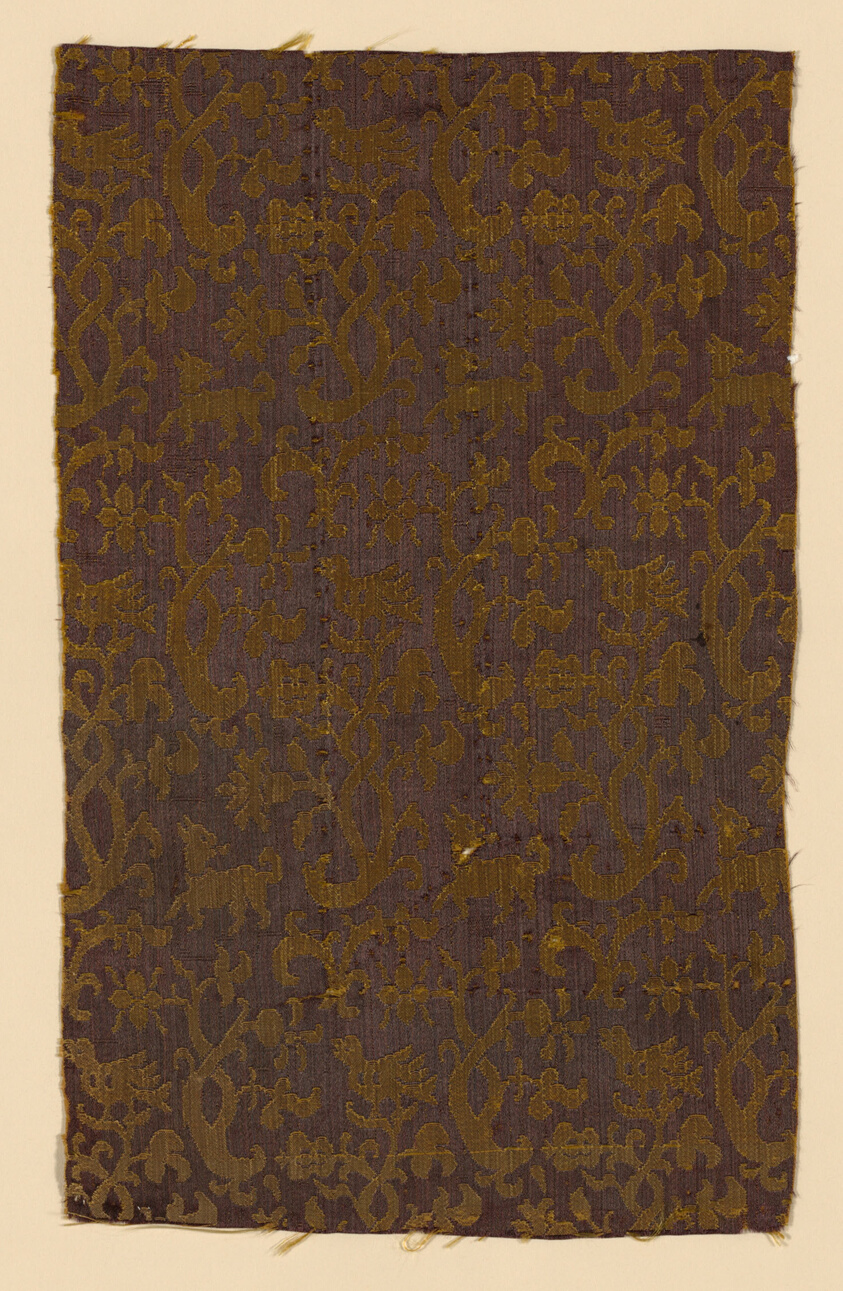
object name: Textile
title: Fragment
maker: Italy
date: 1600/50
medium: Silk, satin weave self-patterned by reversing of faces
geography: Italy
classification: textile; weaving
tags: birds, animals, flowers, foliage